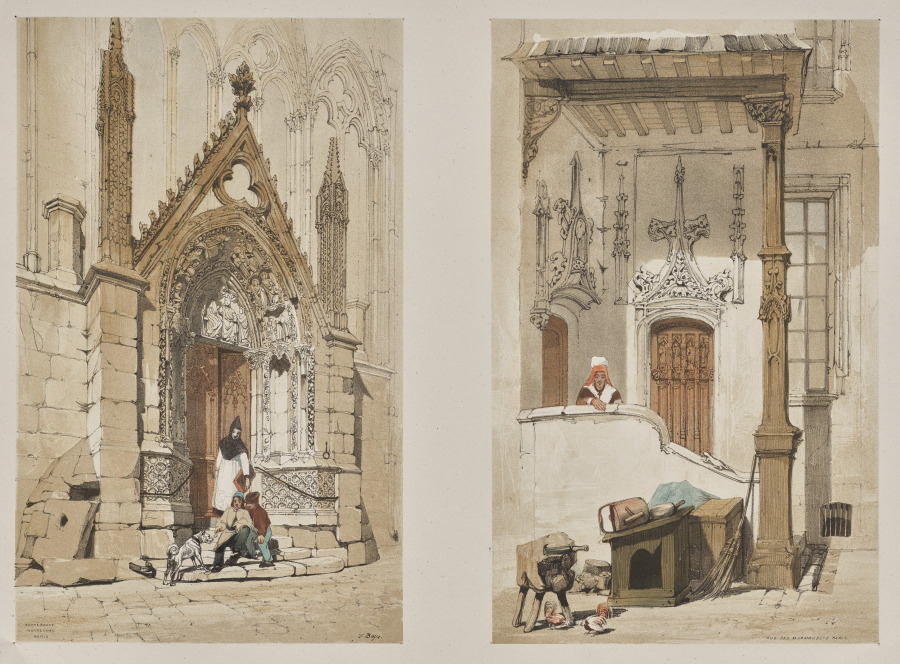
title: Picturesque Architecture in Paris, Ghent, Antwerp, Rouen: Rue des Marmousets, Paris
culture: England, 19th century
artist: Thomas Shotter Boys (British, 1803–1874)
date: 1839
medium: lithograph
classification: Portfolio